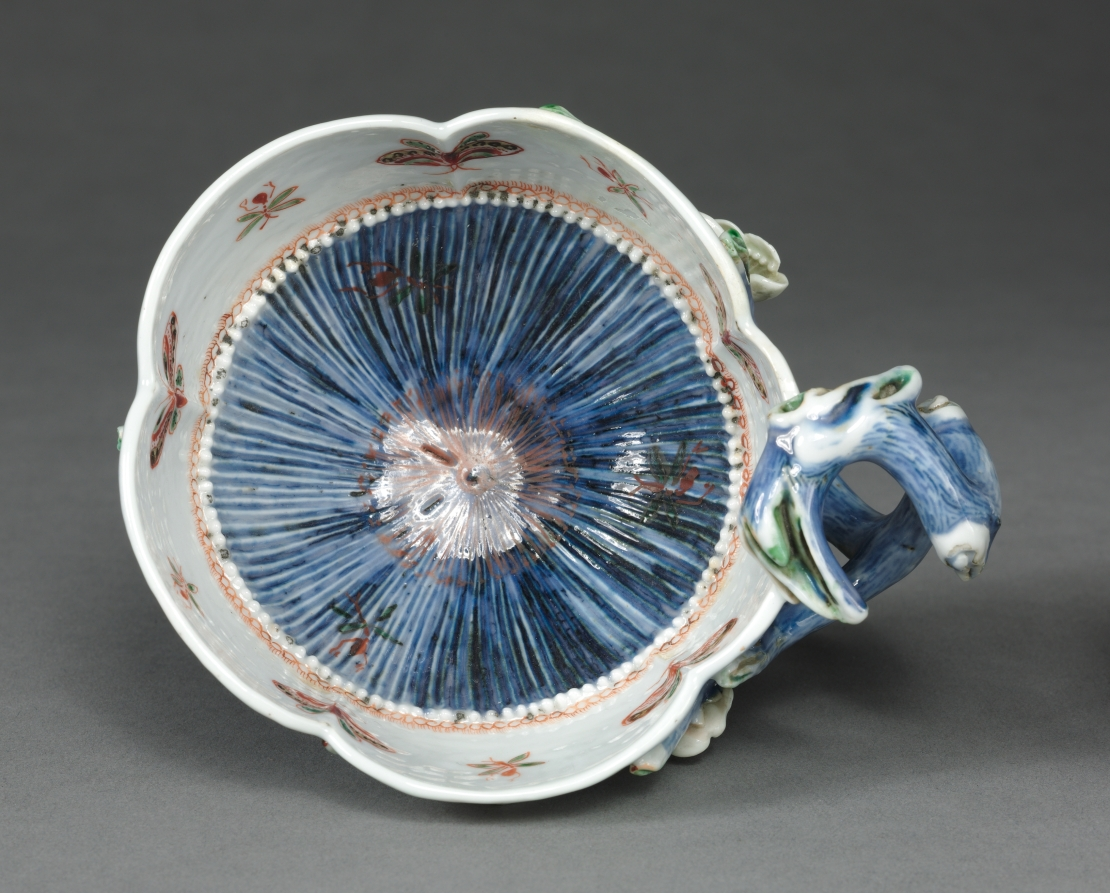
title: Plum Blossom Cup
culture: China, Jiangxi province, Jingdezhen kilns, "Transitional period", Ming dynasty (1368-1644), Tianqi reign (1621-1627)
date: 1621–27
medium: porcelain with underglaze blue and wucai (five color) overglaze enamel decoration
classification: Ceramic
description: This porcelain cup is considered to have been made in the "Transitional period," a term used to define the period between about 1620 and 1683 when official kilns in Jingdezhen were no longer under imperial supervision due to the transition from the Ming to the Qing dynasties.